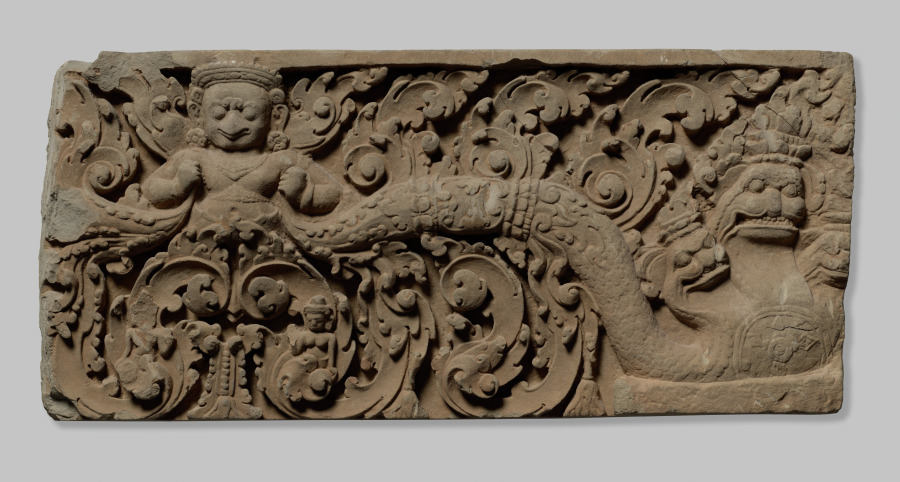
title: Lintel with Garuda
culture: Cambodia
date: 875–925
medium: sandstone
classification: Sculpture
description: Garuda is half man, half eagle, and the mount of Vishnu. His nose is beaklike, and his wings are carved in an exuberant foliate manner, like the swirling leaves that grow from the stem that arches across the middle of the panel. The vegetation yields female figures and jewels before it resolves itself into the heads of a cobra. Garuda is the natural enemy of the serpents, so he holds their tails in check. This decorative lintel is carved in the style of those made for a temple dedicated to the past kings of the Khmer territories. Derived from India’s use of purifying life-affirming imagery around doorways, this Garuda lintel has been rendered in a distinctively Khmer style.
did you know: In the foliage below the Garuda are two tiny female figures, the one on the left badly damaged.